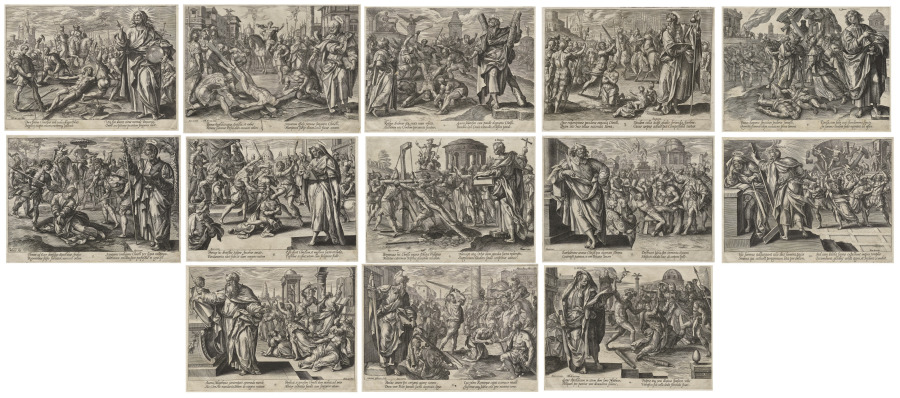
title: Christ, St. Paul, and the Twelve Apostles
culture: Netherlands, 16th century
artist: Hendrick Goltzius (Dutch, 1558–1617)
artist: Hans Collaert the Elder (Flemish, 1520–1581)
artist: Unknown Engraver (Netherlandish)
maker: after Maarten de Vos (Flemish, 1532–1603)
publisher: Aux Quatre Vents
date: c. 1578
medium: Thirteen engravings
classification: Print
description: This print series features thirteen engravings depicting Christ and the Apostles (Christ’s primary disciples). In each scene, an apostle is shown in the foreground, with architecture and landscape behind him that indicate the locales in which he preached Christ’s message, from Rome to India. In the middle ground of each print, the apostle’s martyrdom is enacted with multiple figures, while the party responsible for his death—be it king, idol, or devil—looks on. Martyrdom was tied to sainthood in Roman Catholic theology, and martyrdoms appeared frequently in art made after 1563, when the Catholic Church declared that religious art should create empathetic, personal connections to the saints.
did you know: In the late 16th century, viewing an image of a saint’s martyrdom was meant to create a personal connection to the saint.